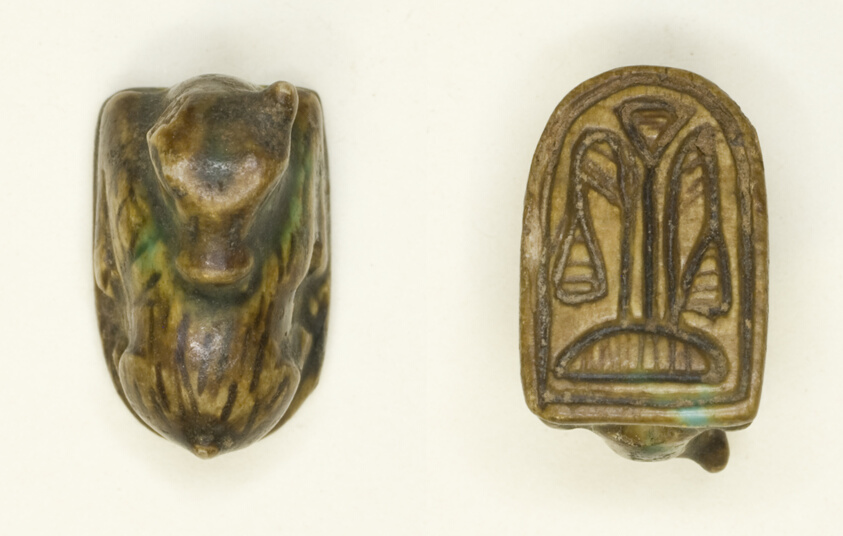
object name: Costume and Accessories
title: Scaraboid: Calf (?)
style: new kingdom, egyptian, ancient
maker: Egyptian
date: New Kingdom, Dynasties 18–20 (about 1550–1069 BCE)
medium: Glazed steatite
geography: Egypt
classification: scaraboids; amulet; ancient art; costume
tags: calfs, floral motifs